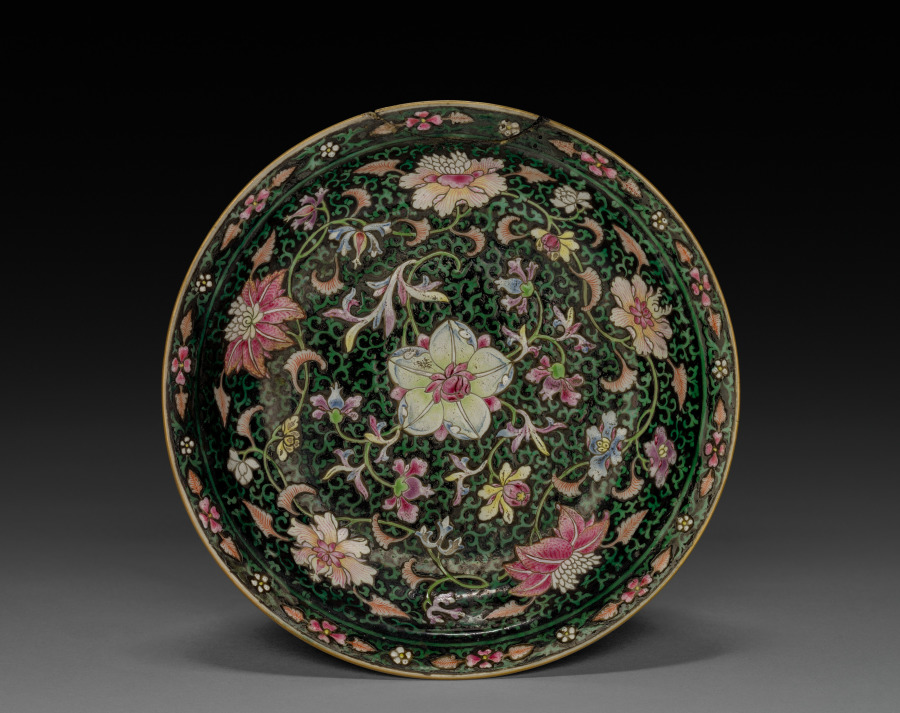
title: Dish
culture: China, Qing dynasty (1644–1911), Qianlong reign (1736–95)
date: 1736–95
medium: porcelain with famille rose overglaze enamel decoration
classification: Ceramic